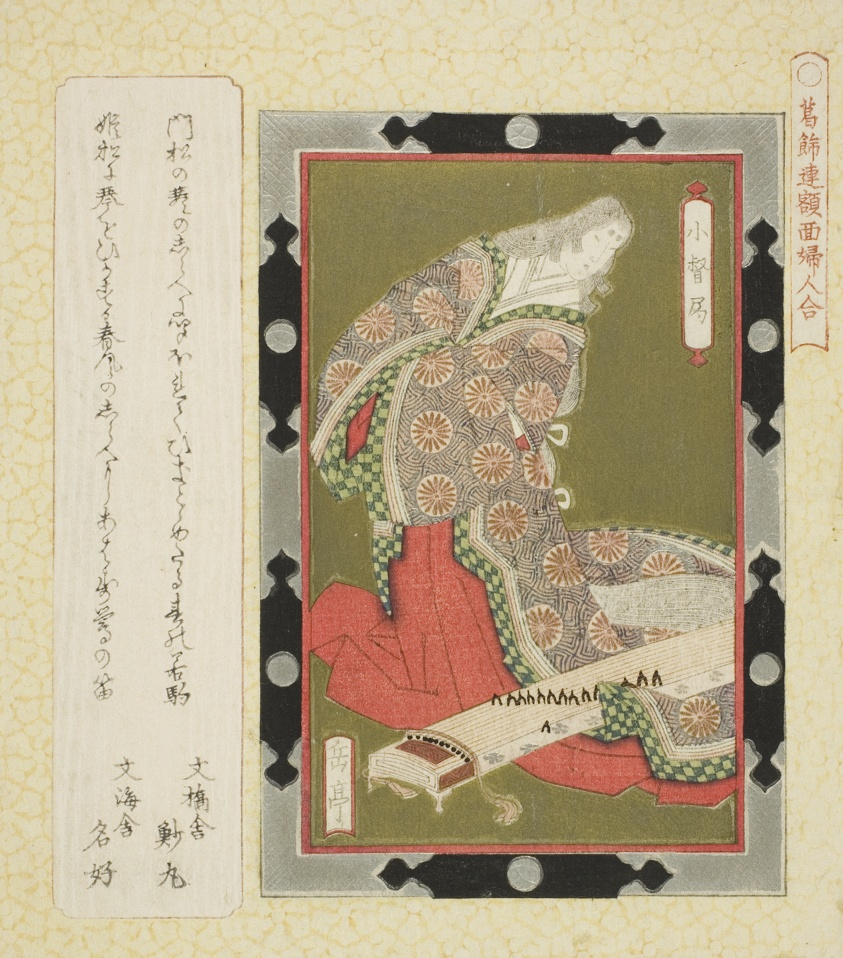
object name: Print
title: Kogo no Tsubone, from the series "Framed Pictures of Women for the Katsushika Circle (Katsushikaren gakumen fujin awase)"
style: Japanese (culture or style)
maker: Yashima Gakutei (Japanese, 1786 (?)-1868)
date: c. 1822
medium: Color woodblock print; shikishiban, surimono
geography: Japan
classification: woodblock print; print; asian art